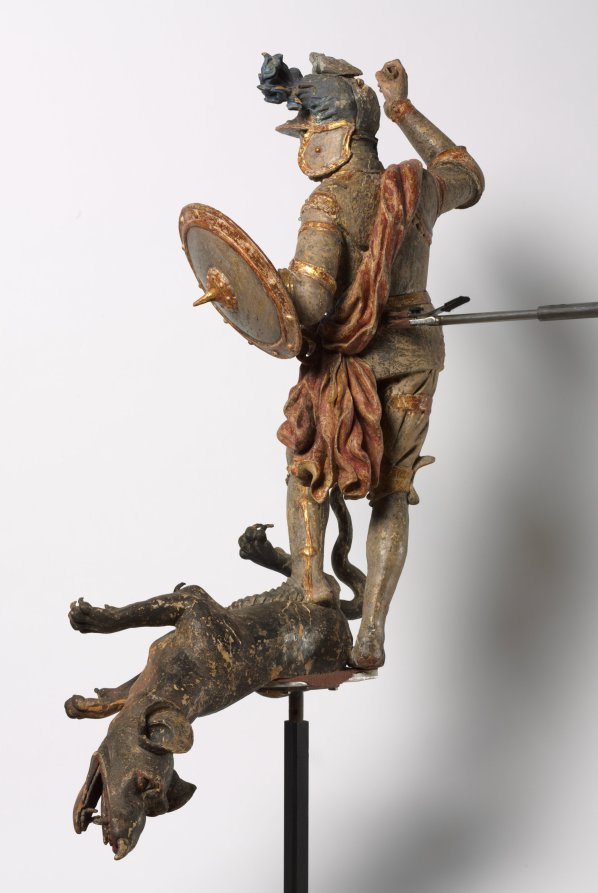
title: Saint George and the Dragon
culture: South Germany or Austria, late 17th century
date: late 1600s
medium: painted and gilded wood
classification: Sculpture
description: Saint George, a Roman soldier martyred for his Christian faith, is best known for slaying a fearsome dragon that terrorized the city of Silene, in Libya. George offered to kill the monster if residents of the city convert to Christianity. Here, George stands triumphantly over the dragon, writhing as it dies. The artist deliberately incorporated features intended to make his figure seem more familiar: the dragon seems more canine than reptilian, while George wears armor from the recent past and bears almost portrait-like facial features.